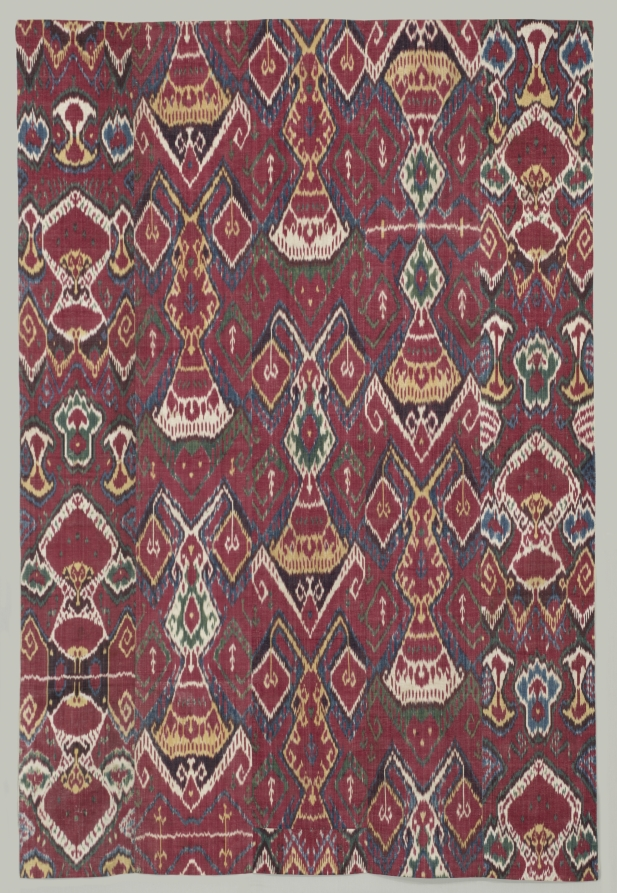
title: Wall Hanging (pardah)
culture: Uzbekistan, Bukhara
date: 1800–1850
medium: Silk: warp-faced plain weave, warp-ikat; cotton weft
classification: Textile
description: Dazzling patterns with saturated colors in the ikat technique provided vibrant wall hangings in reception rooms of the urban elite in Central Asia. In this splendid example composed of five loom widths, the three central lengths display a precise design of amulets complemented by palmettes in the two outer lengths. The irregular contours, telltale indicators of ikat, are masterfully controlled with five rich colors, illustrating the high quality of the earliest known examples in Central Asia from the first half of the 1800s. In the ikat technique, the design was dyed on the warp before it was woven in a resist-dye process. Thread was tightly wrapped around the warp to resist dye penetration for each area of color. This labor-intensive process created hangings and garments cherished for their vibrant colors with "fuzzy" contours.